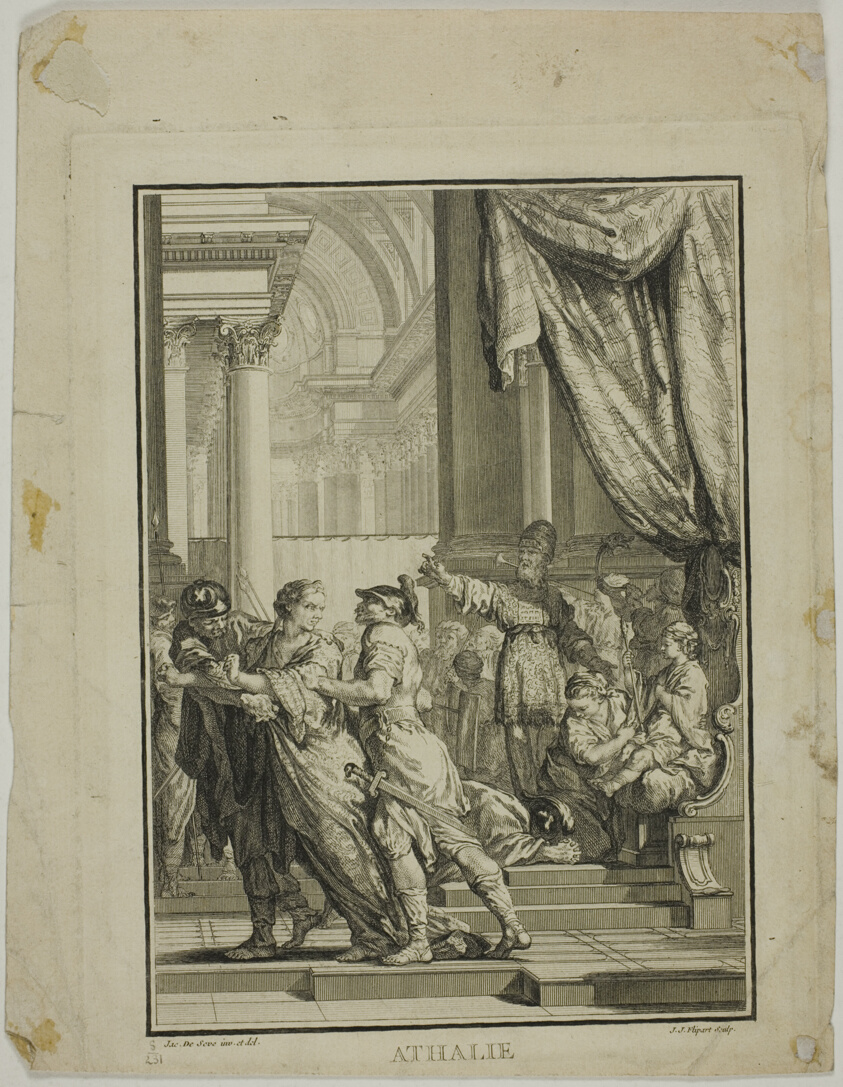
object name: Print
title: Frontispiece for Athalie, Act V, Scene VI, from Racine's Oeuvres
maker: Jean-Jacques Flipart (French, 1719-1782); after Jacques de Sève (French, active 1742-1788)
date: 1760 or 1767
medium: Etching with engraving and stipple on cream laid paper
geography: France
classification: etching; print; prints and drawing